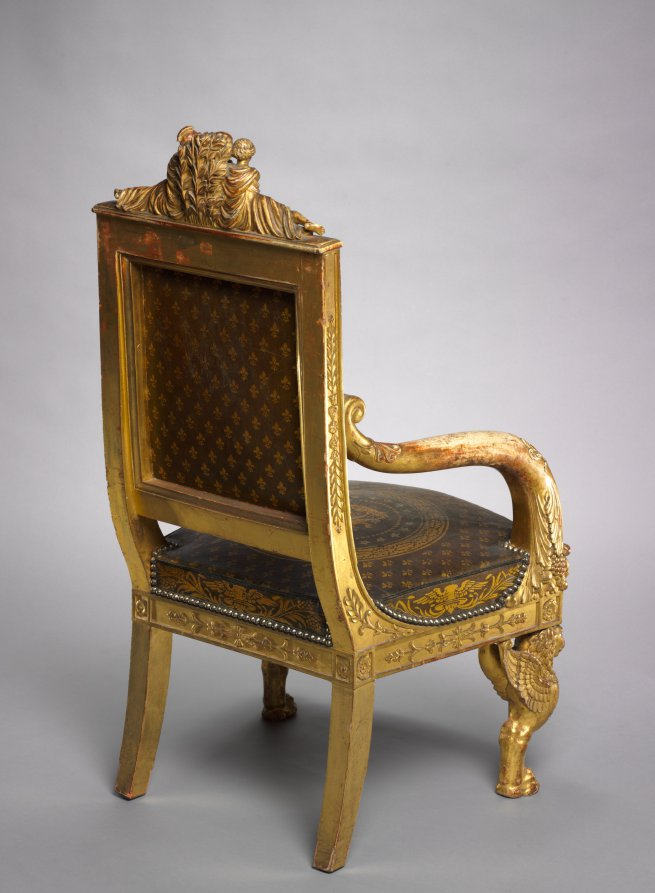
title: Child's Throne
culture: France, Paris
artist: Pierre-Marie Balny le Jeune (French, 1832)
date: 1822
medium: carved and gilded wood, leather upholstery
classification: Furniture and woodwork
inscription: inscribed with stencils inside back rail: BLONDEL TAPISSIER/RUE ST. ANTOINE N 72 1822 inscribed in ink lower edge back rail: 12 JANVIER 18[22?]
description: This chair was made for the young, presumed successor to the French throne who ruled briefly as Henri V in 1830, the last of the direct Bourbon line. He is depicted at the center of the top rail protected by female figures representing France and Minerva, the Roman goddess of wisdom. Fleurs-de-lis and the Gallic rooster, symbols of French royalty and the French people, decorate the upholstery.